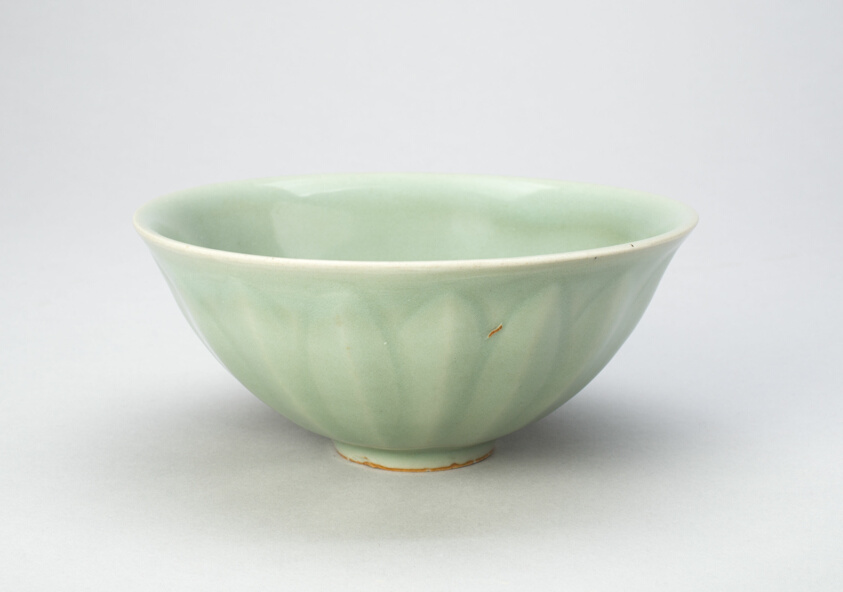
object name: Vessel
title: Lotus Petal Bowl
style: Chinese (culture or style)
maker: China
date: Southern Song dynasty (1127–1279), 13th century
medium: Longquan ware; stoneware with underglaze carved decoration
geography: China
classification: bowl; stoneware; dish (vessel); asian art; ceramics; vessel